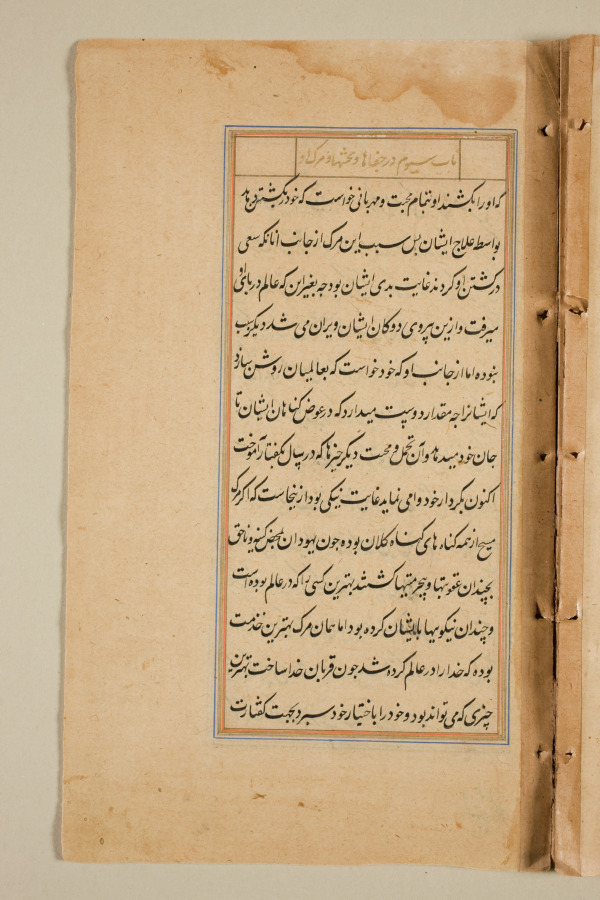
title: Text page from a Mirror of Holiness (Mir’at al-quds) of Father Jerome Xavier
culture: Mughal India, Allahabad, made for Prince Salim (1569–1627)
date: 1602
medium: Ink and gold on paper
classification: Manuscript